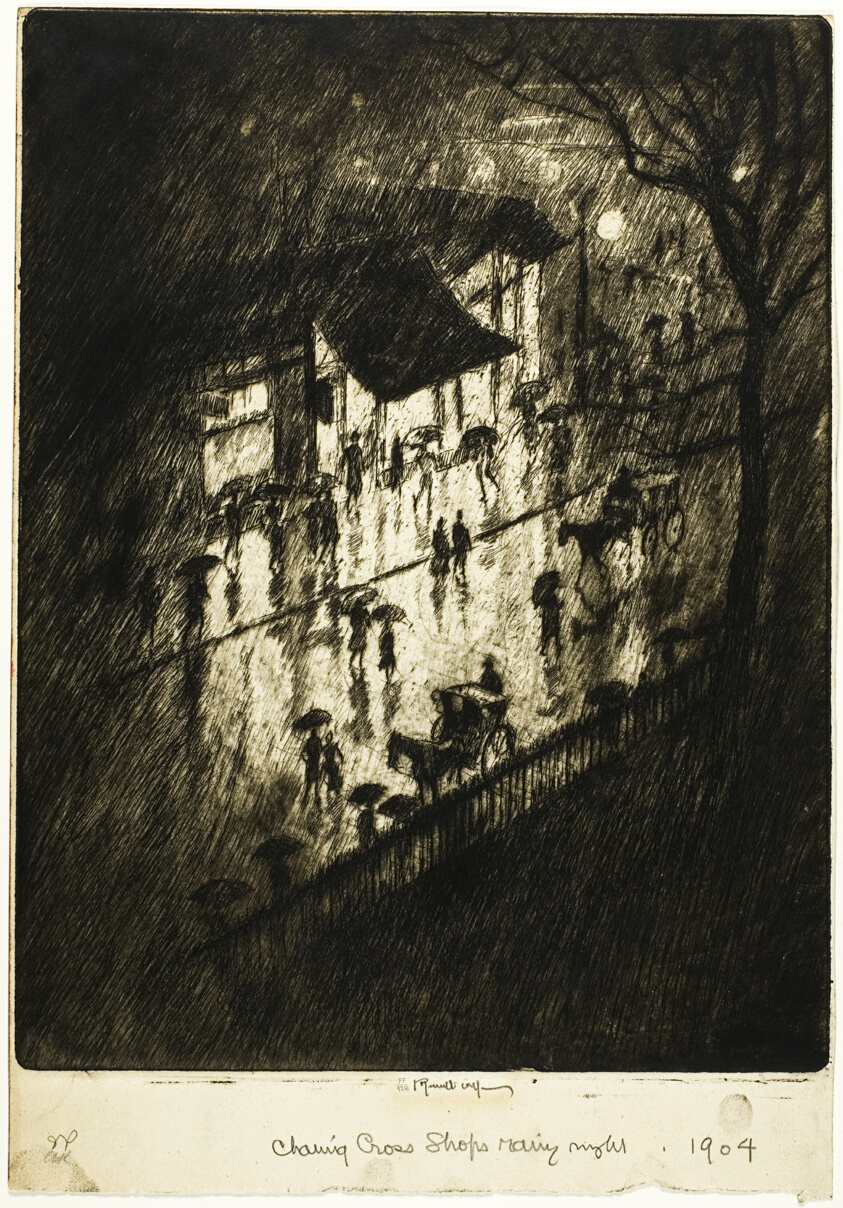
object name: Print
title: Rainy Night, Charing Cross Shops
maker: Joseph Pennell (American, 1857-1926)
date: 1903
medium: Etching on ivory wove paper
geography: United States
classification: etching; print; prints and drawing